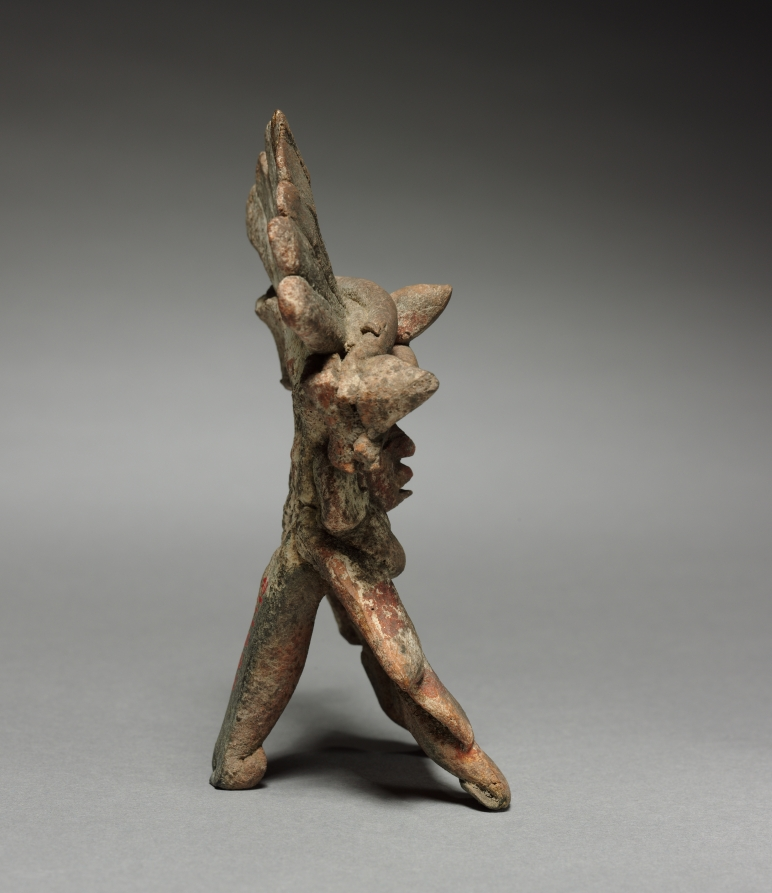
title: Figurine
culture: Mexico, Teotihuacan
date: 1–750 CE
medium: pottery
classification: Ceramic